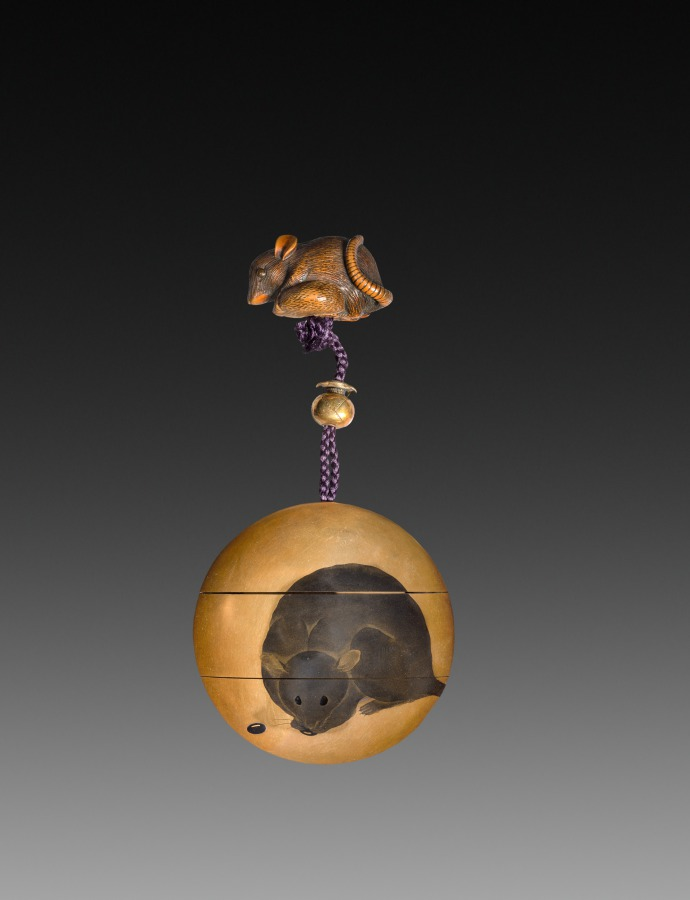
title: Inro (Case) with Mice and Beans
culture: Japan, Meiji period (1868–1912)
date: late 1800s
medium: Lacquer on wood with color and sprinkled gold powder design (maki-e)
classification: Lacquer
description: This round inro is decorated with an image of a single mouse feasting on beans. The theme is elaborated with a metal ojime (cinch) in the form of a cloth bag tied with rope—suggesting the food stores the mouse is raiding. The carved wood netsuke, or toggle, is in the shape of a mouse clutching a nut.